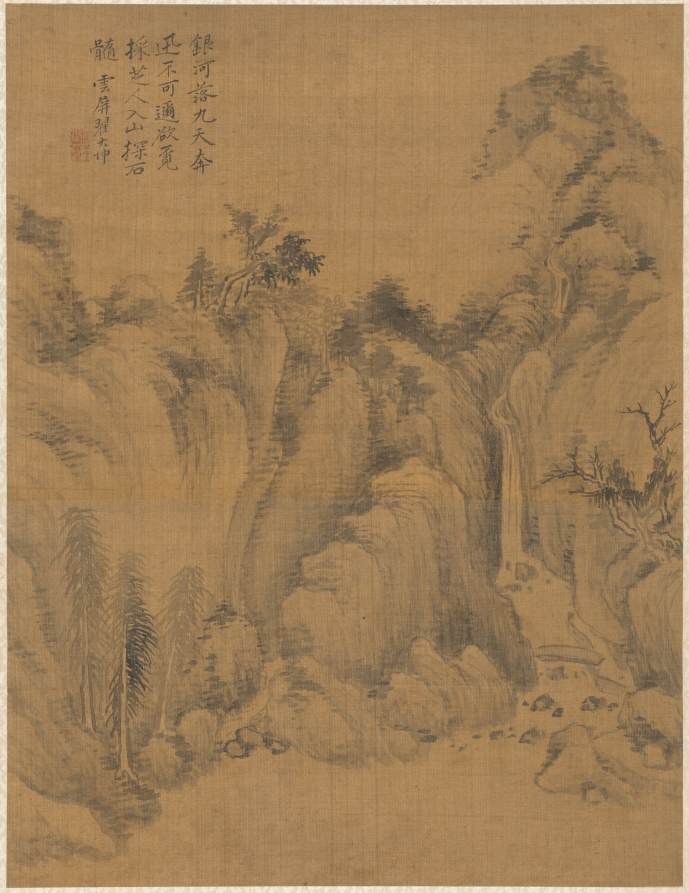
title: Landscape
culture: China, Qing dynasty (1644-1911)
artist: Zhai Dakun (Chinese, d. 1804)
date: 1775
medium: album leaf; ink and color on silk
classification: Painting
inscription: Waterfall and Rocks. The Milky Way descends from the ninth heaven, No matter how swift one is, one can't even come close to it. I would seek the man who gathers mushrooms, He has entered the mountains to search out the rocks' marrow. Yunping Zhai Dakun. Seals: 1) r/i "Dakun" 2) r/r "Zihou"